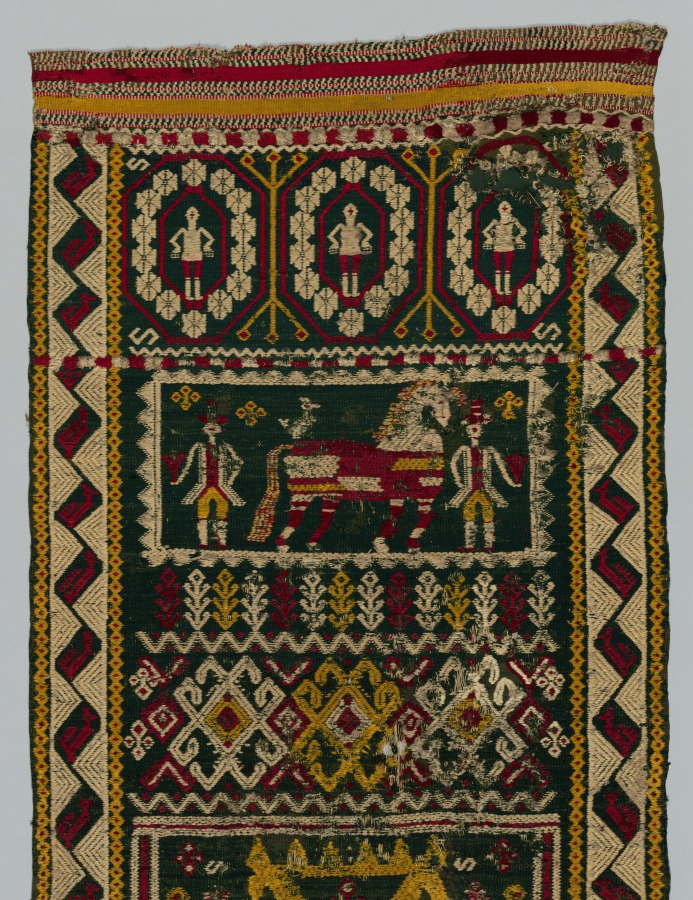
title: Woven Chest or Bed Cover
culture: Italy, Terra di Lavoro, 18th century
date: 1700s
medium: embroidery; wool on linen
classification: Textile